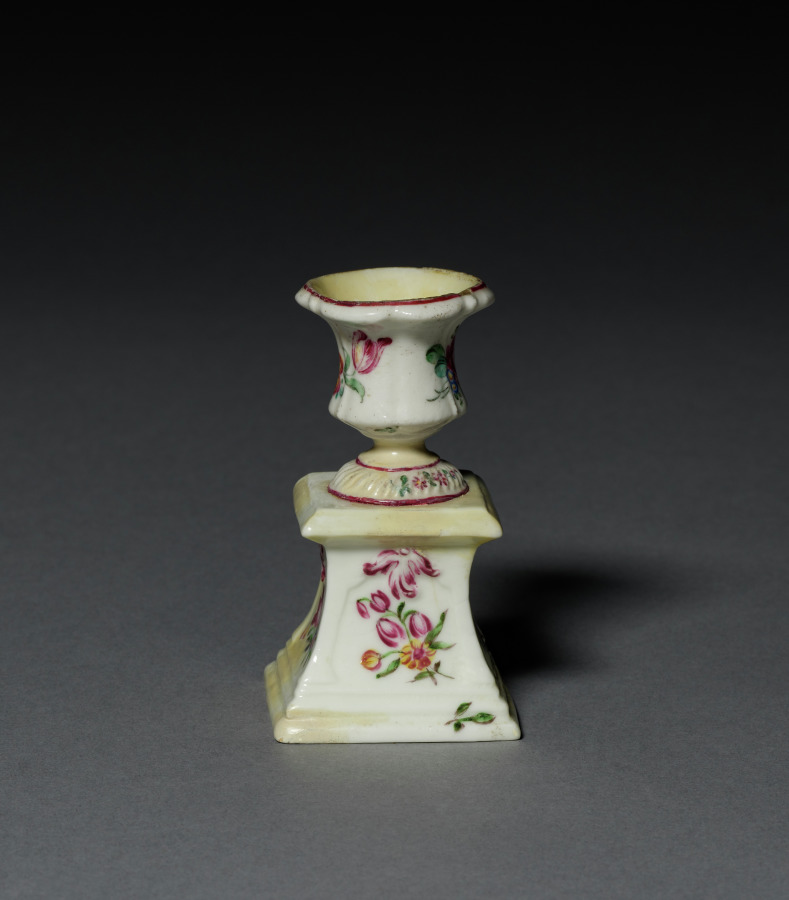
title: Medici Vase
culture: France, Mennecy, 18th century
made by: Mennecy Factory (French)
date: c. 1760–1765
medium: soft-paste porcelain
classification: Ceramic